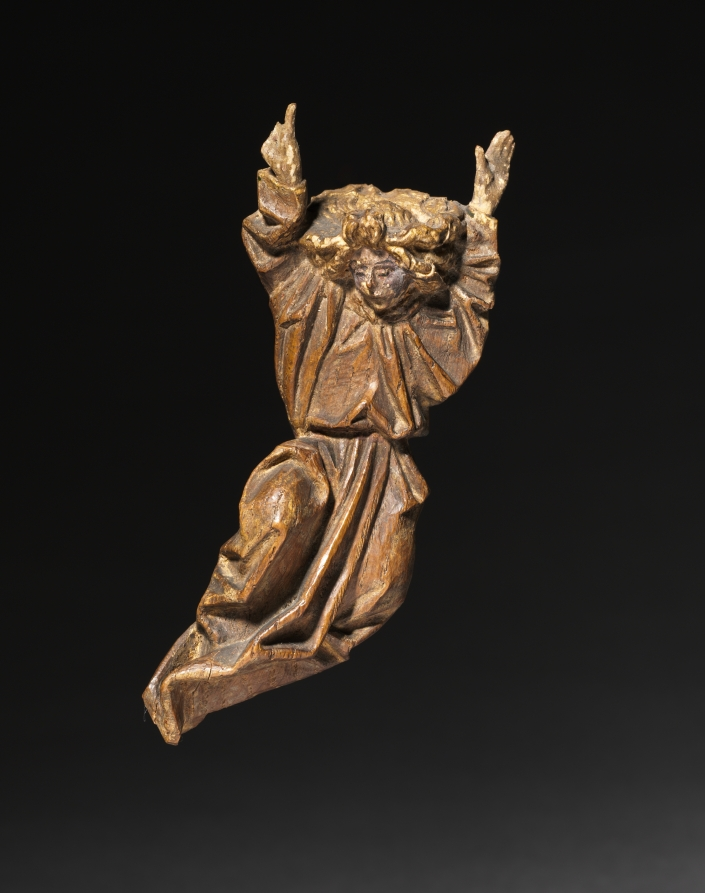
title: Angel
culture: South Netherlands, Brabant, 16th century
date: c. 1500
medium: oak with traces of gilding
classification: Sculpture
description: This lamenting angel probably comes from a Crucifixion scene at the center of a multi-figured altarpiece.